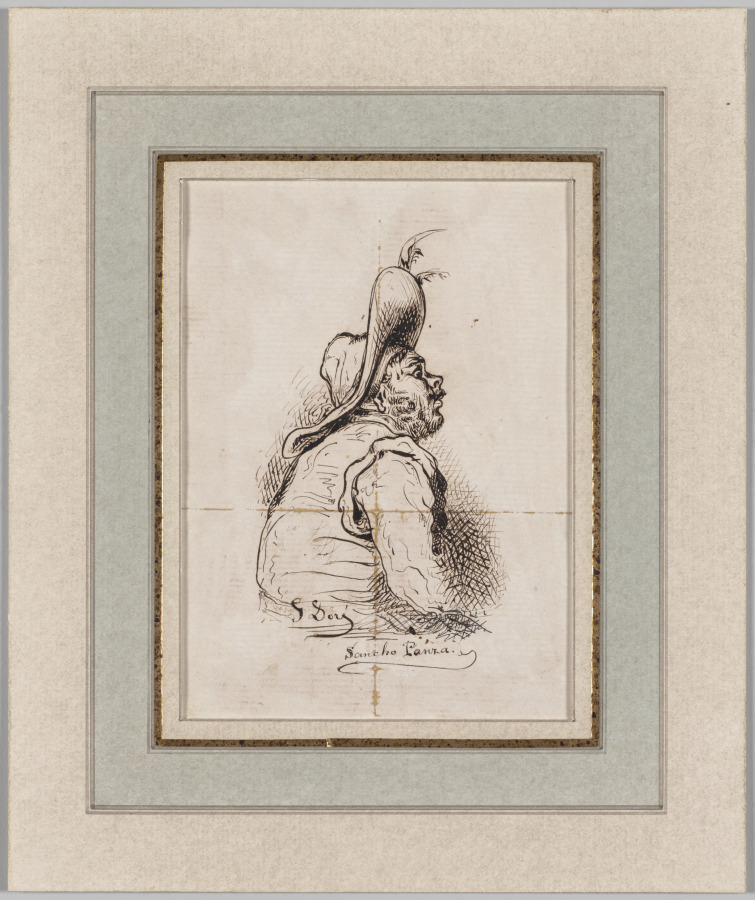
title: Sancho Panza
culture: France, 19th century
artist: Gustave Doré (French, 1832–1883)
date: c. 1863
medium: Pen, brown ink, black ink on modern laid paper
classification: Drawing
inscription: Lower center, in black/brown ink: “G Doré / Sancho Panza”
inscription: Verso, upper right, in pencil: “Goodman / 9086”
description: This image is one of a large group of illustrations that French artist Gustave Doré made for an 1863 edition of Miguel de Cervantes’s novel Don Quixote, originally published in 1605. It depicts Sancho Panza, the humorous sidekick of the novel’s hero. Placed at the end of a chapter in the book, this vignette emphasizes Sancho’s stocky form and curiosity, as he looks forward attentively.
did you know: This drawing is one of almost 400 that Gustave Doré created to illustrate Don Quixote.